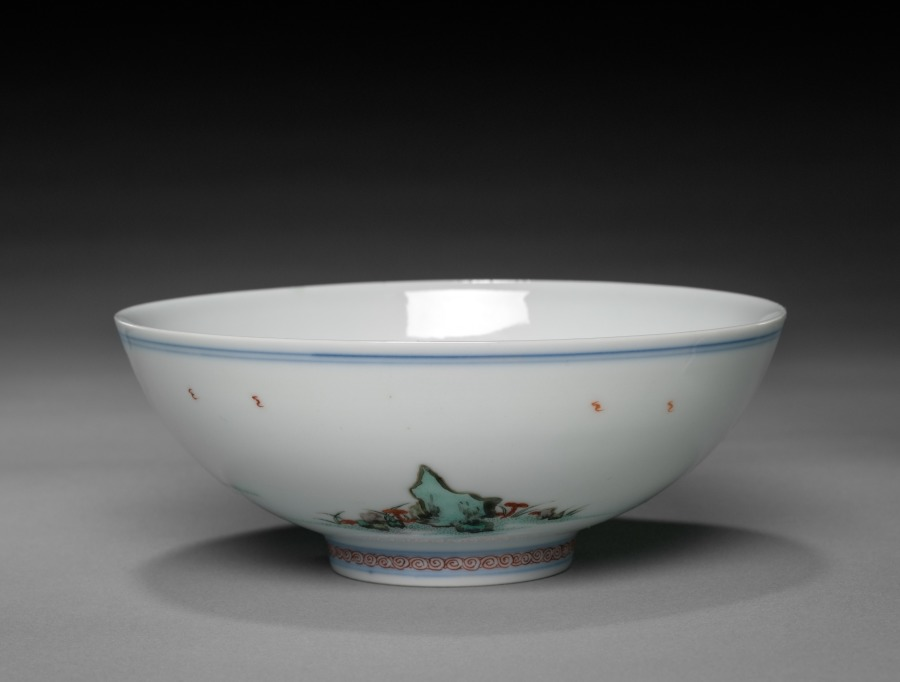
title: Bowl with Xiwangmu and Attendants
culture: China, Jiangxi province, Jingdezhen, Qing dynasty (1644-1911), Kangxi reign (1662-1722), but Chenghua mark (1465-87)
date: 1662–1722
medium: porcelain with famille verte overglaze enamel decoration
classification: Ceramic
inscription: 大明成化年製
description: Xiwangmu is the name for the Queen Mother of the West, an ancient Chinese goddess.